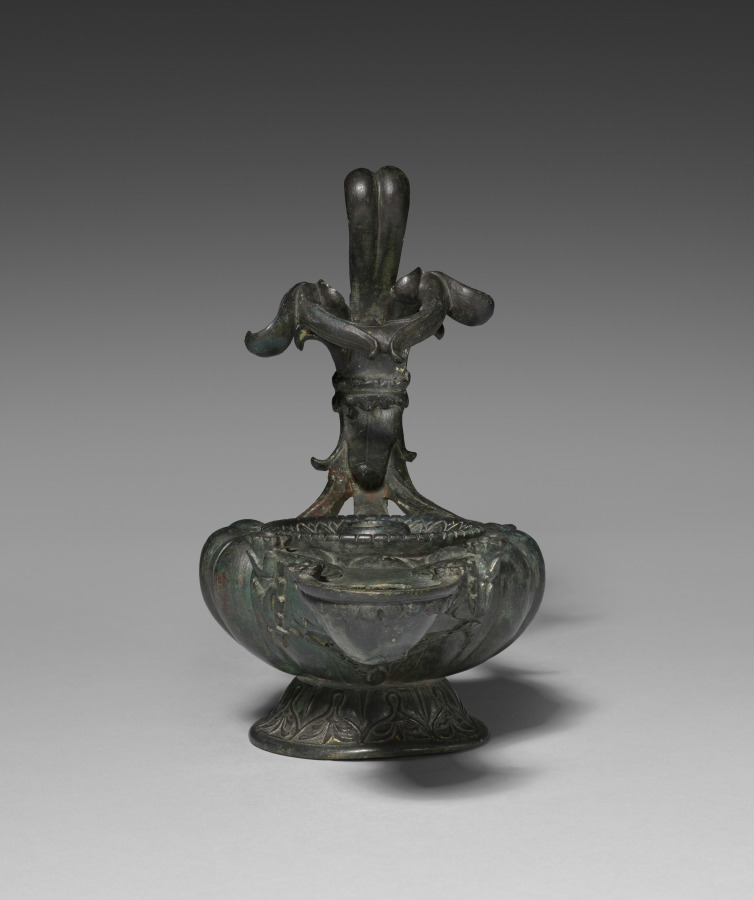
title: Oil Lamp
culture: Roman, late Republican-early Imperial (c. 50 BCE – 50 CE)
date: c. 50 BCE–50 CE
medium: Bronze, cast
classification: Metalwork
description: This large and ornate cast bronze oil lamp features a central hole for filling and a single spout for its wick. Its extravagant handle rises to create both a loop and a sort of hook, one or both of which may have served to suspend the lamp when lit. Alternatively, the lamp may have stood on its own, perhaps atop a tall lampstand. While its primary function may have been for lighting dark spaces, this lamp must also have served an ornamental purpose.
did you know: When used, this lamp likely hung from the ceiling or stood on a tall lampstand.